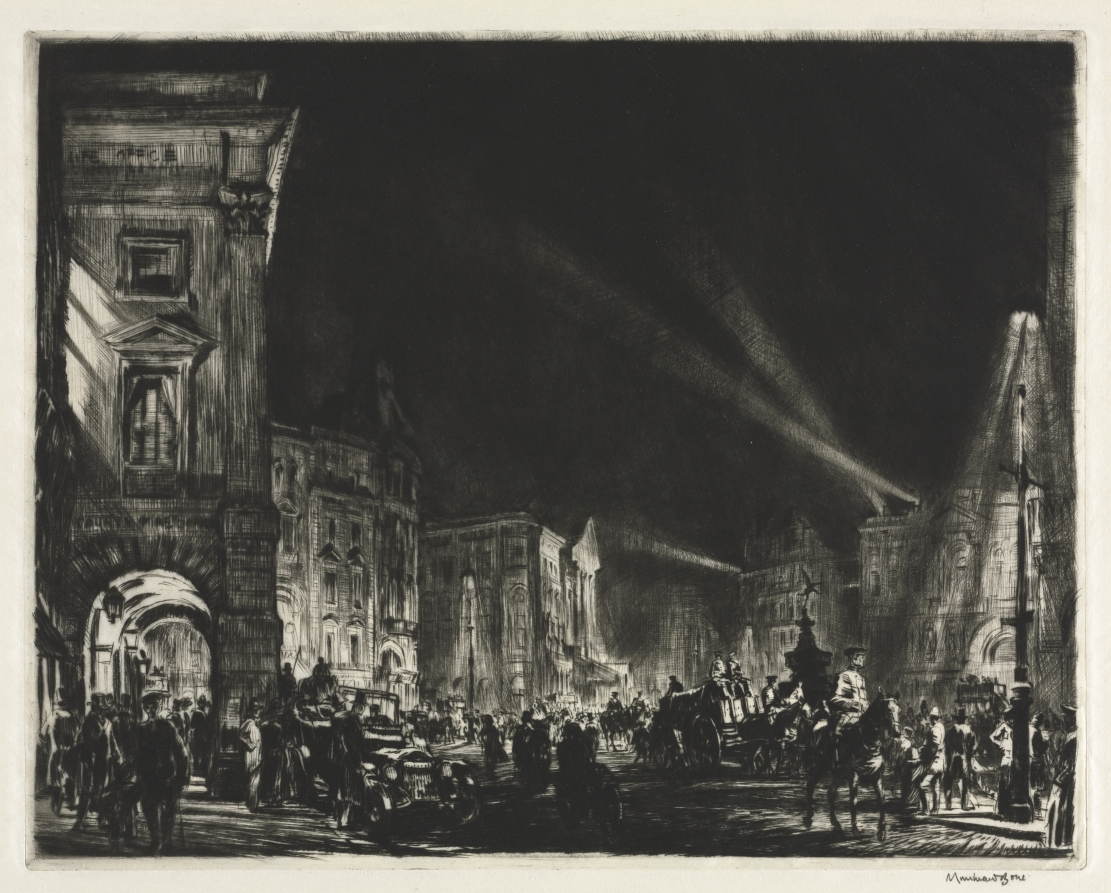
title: Picadilly Circus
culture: England, 20th century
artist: Muirhead Bone (British, 1876–1953)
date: 1915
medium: drypoint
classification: Print